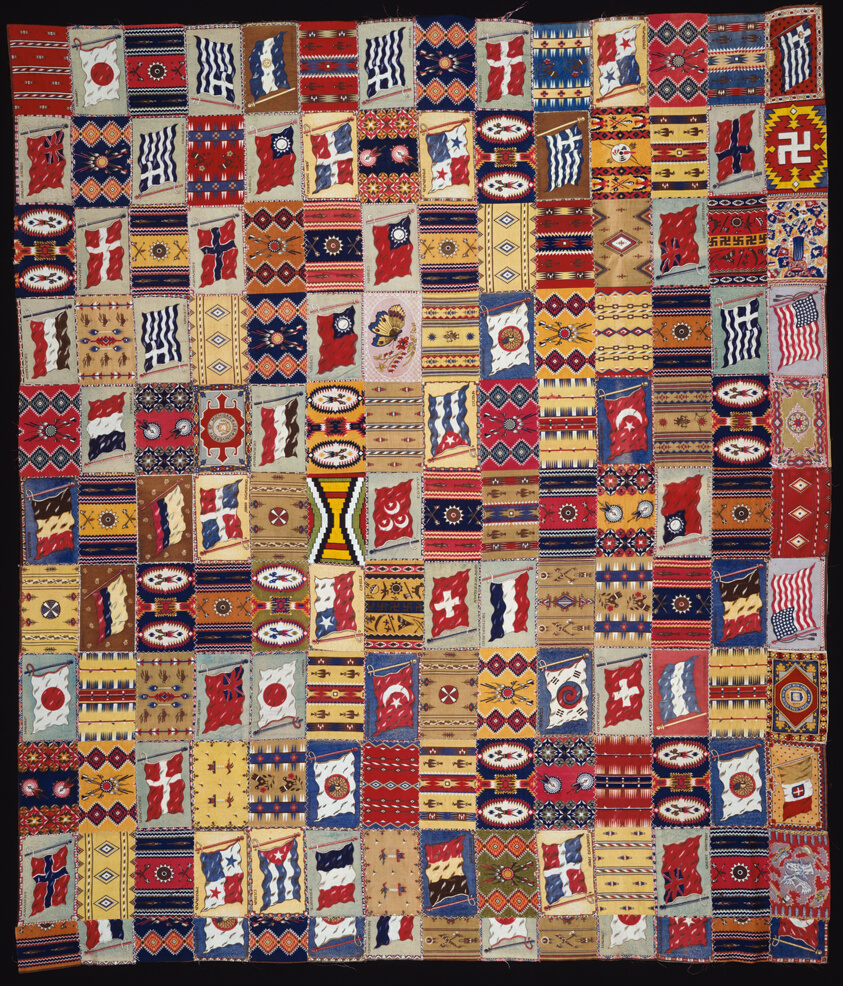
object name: Textile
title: Quilt Top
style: 20th Century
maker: United States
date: 1900/20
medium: Cotton, plain weave; engraved-roller printed; fulled; pieced with cotton, machine stitching; embroidered with cotton in long-armed cross stitches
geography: United States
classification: needlework - quilt; textile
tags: flags, rectangles, squares, blankets